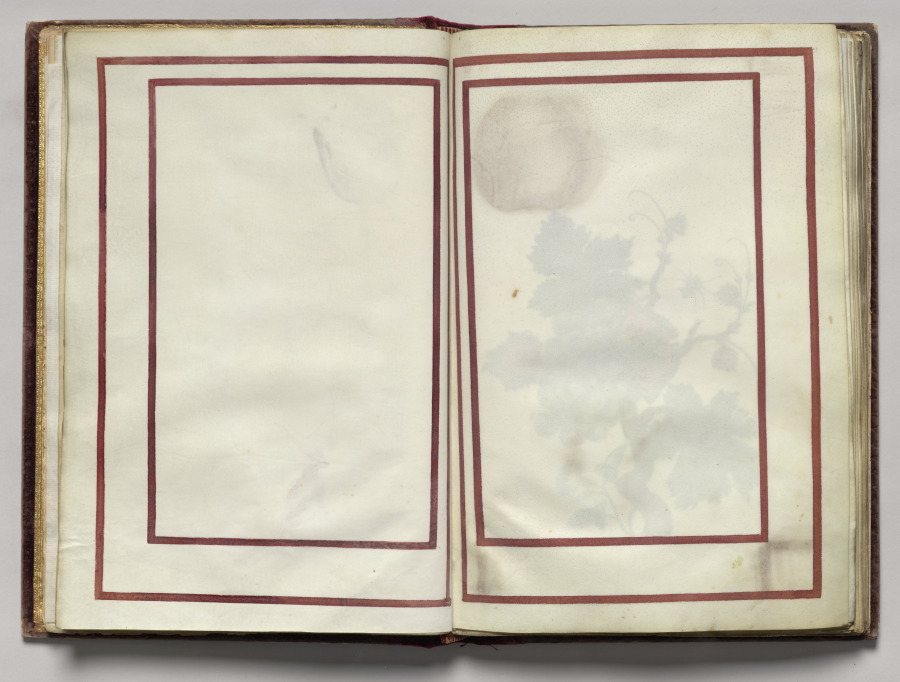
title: Border, folio 9 (verso), from Florilegium (A Book of Flower Studies)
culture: France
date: 1608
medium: watercolor, ink, silver and gold over occasional traces of pencil, on vellum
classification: Bound Volume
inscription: Dated: Poitiers 1608 (on frontispiece) Signed: On frontispiece in black ink, lower right: Van Kuyk Notation on drawing: Frontispiece: in pencil, lower margin: * élève de Van Kessel, peintre flammand (* in pencil also appears in front of Van Kuyk's name).